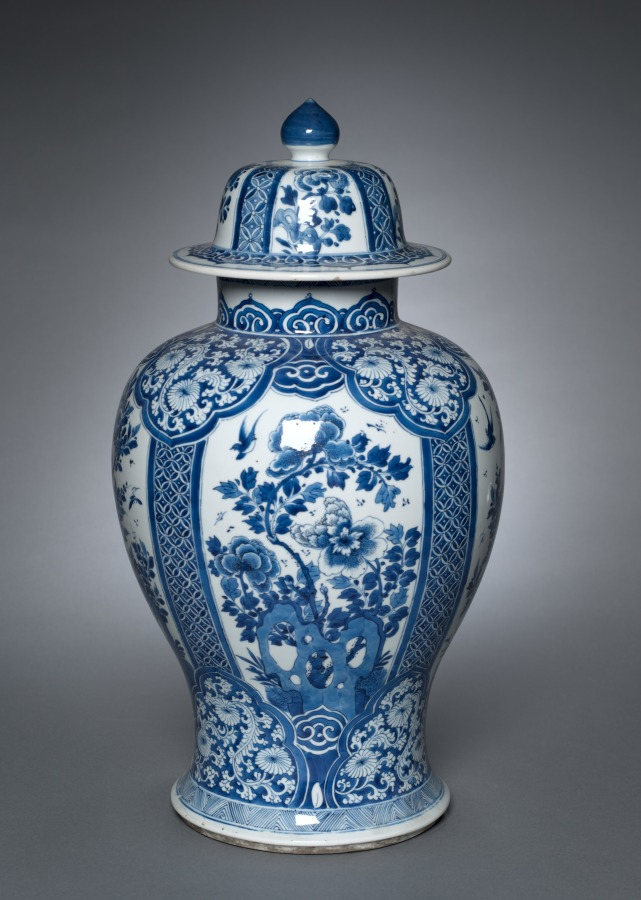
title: Vase with Cover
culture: China, Jiangxi province, Jingdezhen kilns, Qing dynasty (1644–1911), Kangxi reign (1662–1722)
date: 1662–1722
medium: porcelain with underglaze blue decoration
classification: Ceramic